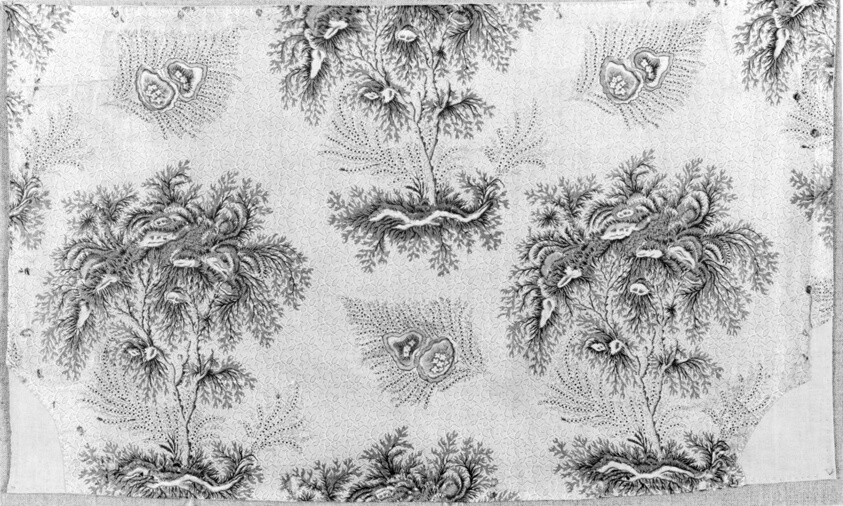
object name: Textile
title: Panel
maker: England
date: c. 1840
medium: Cotton, plain weave; printed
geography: England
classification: textile; weaving - printed